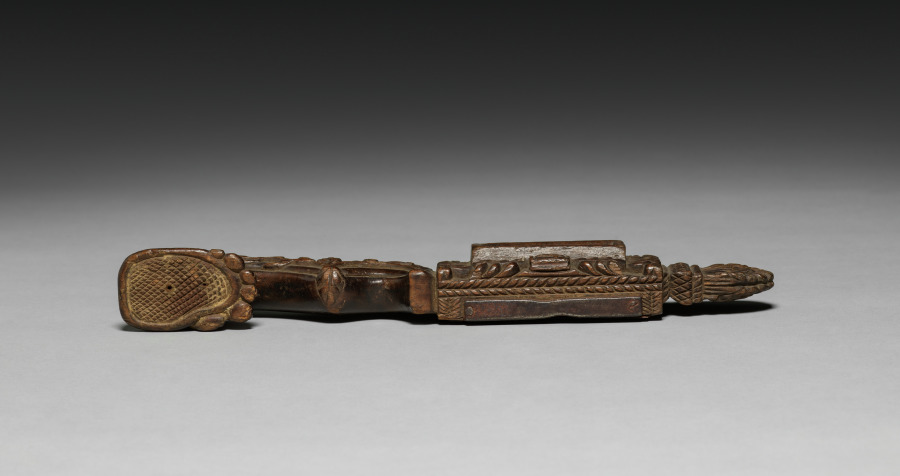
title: Scraper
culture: France or Italy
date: 1600s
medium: wood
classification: Tool